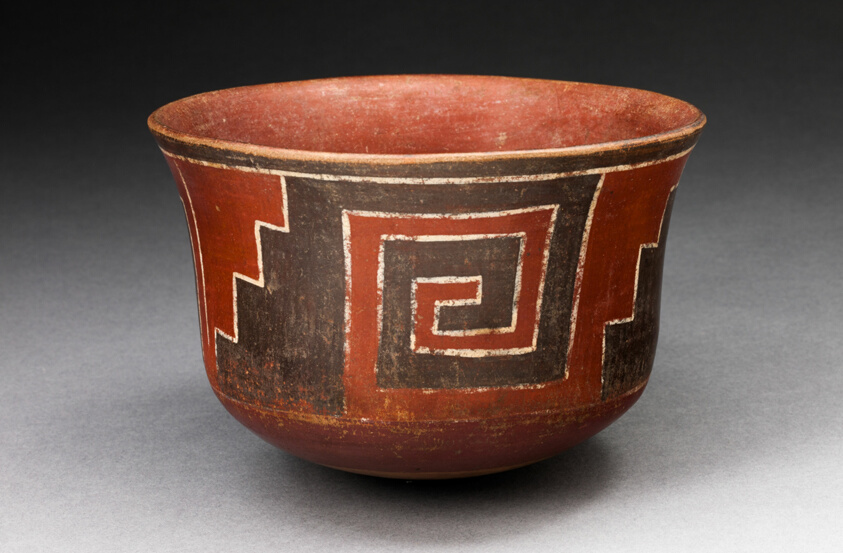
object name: Vessel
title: Cup with Stepped-Fret Motif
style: nazca, early intermediate period, Pre-Columbian, americas, Arts of the Americas, andean, andes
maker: Nazca; South coast, Peru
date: 180 BCE–500 CE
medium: Ceramic and pigment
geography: Nazca Valley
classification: earthenware; art of the americas; ceramics; vessel